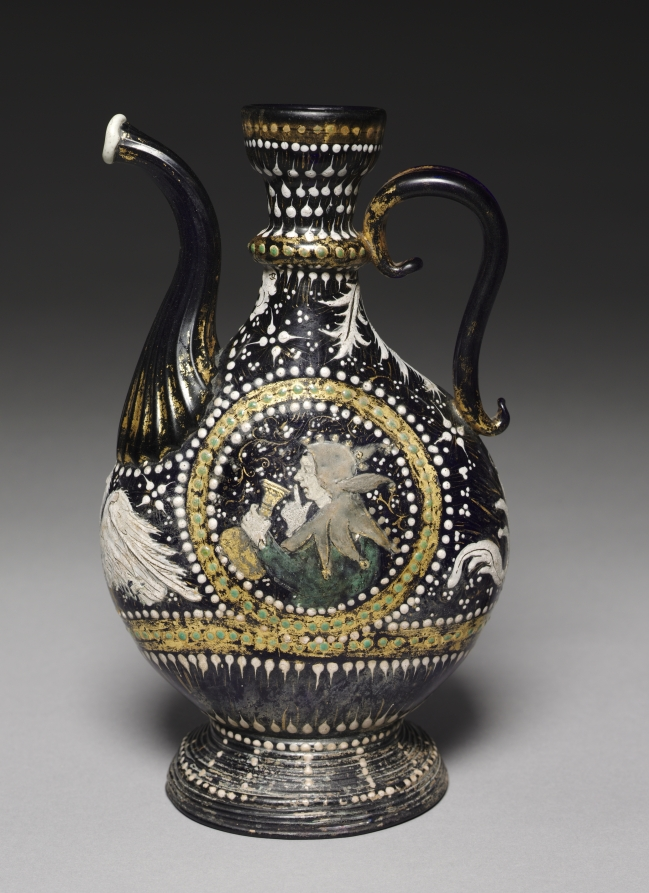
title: Ewer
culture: Italy, Venice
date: c. 1480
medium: enameled lapis-blue glass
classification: Glass